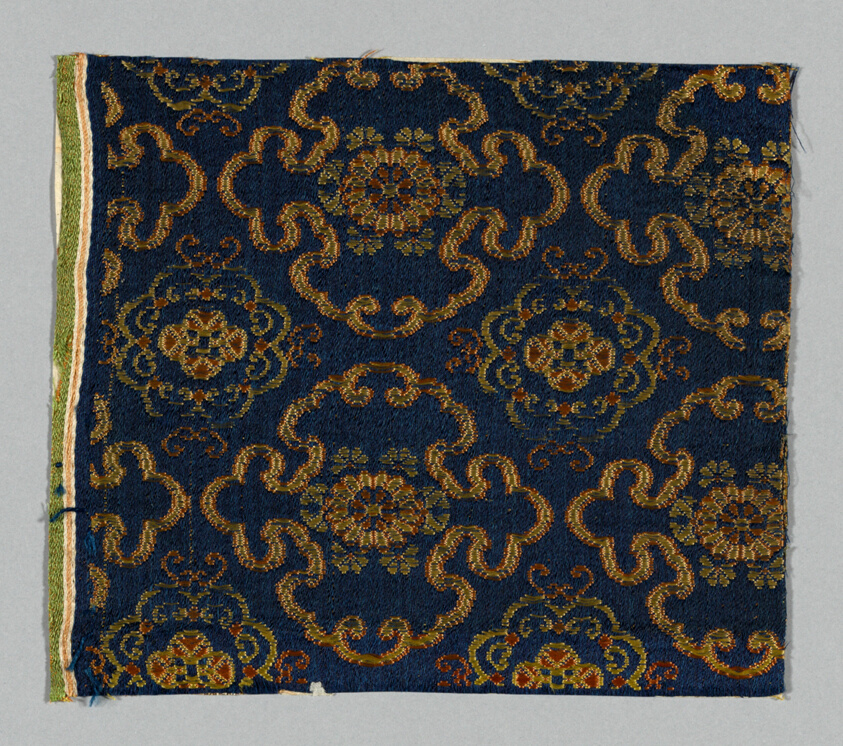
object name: Textile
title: Fragment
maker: Japan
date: Edo period (1615–1868), 1775/1800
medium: Silk, satin weave with self-patterning wefts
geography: Japan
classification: textile; weaving